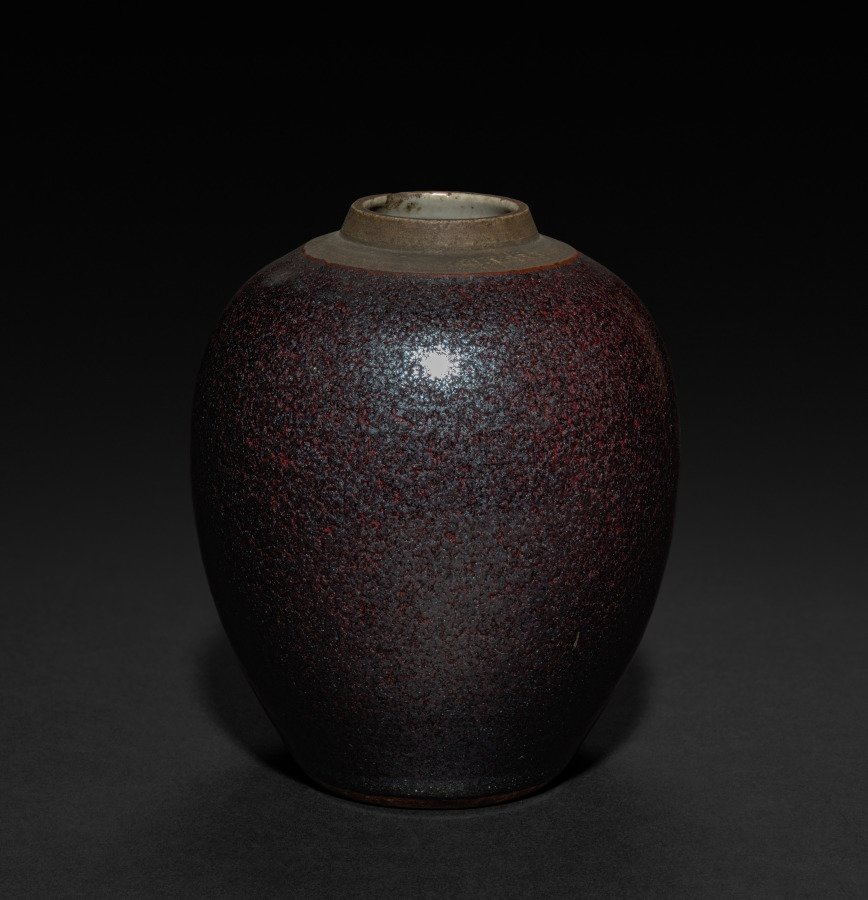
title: Jar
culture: China, Qing dynasty (1644–1911), Qianlong reign (1736–95)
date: 1736–95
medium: porcelain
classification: Ceramic